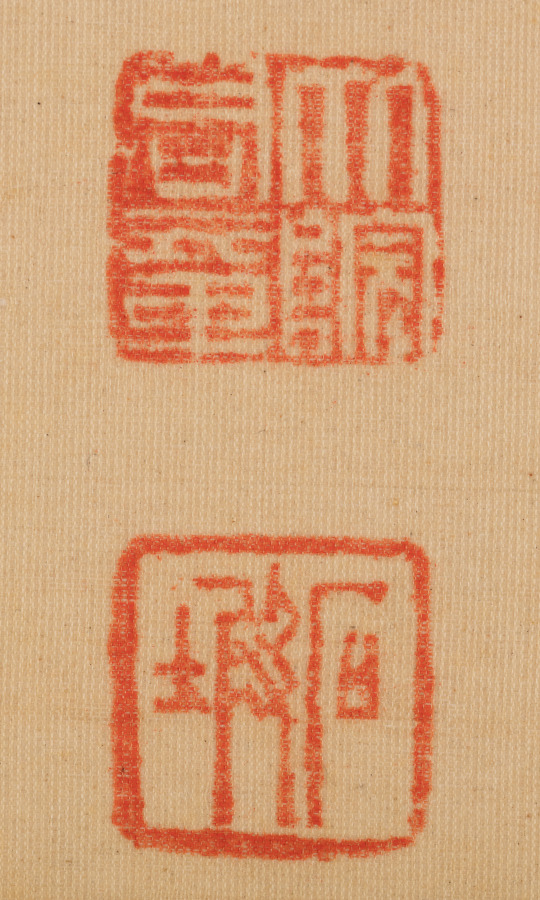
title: Orchids and Rocks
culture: Korea, Joseon dynasty (1392–1910)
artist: Yi Ha-eung (Korean, 1820–1898)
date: 1897–98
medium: Eight-panel folding screen; ink on silk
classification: Painting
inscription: Translation: [I] painted for the high minister Yangwon. [I] humbly request your corrections and advice [on my painting]. [By] an eighty-year old gentleman of rocks.)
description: Yi Ha-eung (1820−1898), the artist of this eight-panel folding screen, was one of the most influential men in late 19th-century Korea. Acting as the regent for his son, King Gojong (1852−1919), who ascended the throne at the age of thirteen, Yi ruled Korea from 1866 to 1873. In addition to his illustrious political career, Yi was also recognized as one of the most celebrated artists who led the revival of literati art in late 19th-century Korean art. In particular, he was recognized as the master of orchids, one of the “Four Gentlemen” (plum, orchid, chrysanthemum, and bamboo) themes. Solely relying on monochrome ink, Yi depicted the curvilinear silhouettes of cymbidium orchid leaves dramatically hanging down from cliffs. Growing in wilderness and redolent with fragrance, orchids were often associated with the perseverance of principled gentlemen, and thus became one of the most popular subjects of scholar-artists' paintings.On the upper right corner of the far left panel, Yi wrote a short inscription stating that he painted the work at the age of 80.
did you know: The artist of this elegant painting is the formidable politician Yi Ha-eung (1820–1898), who is known for a seclusion policy that aimed to protect Korea and its sovereignty from foreign influences.